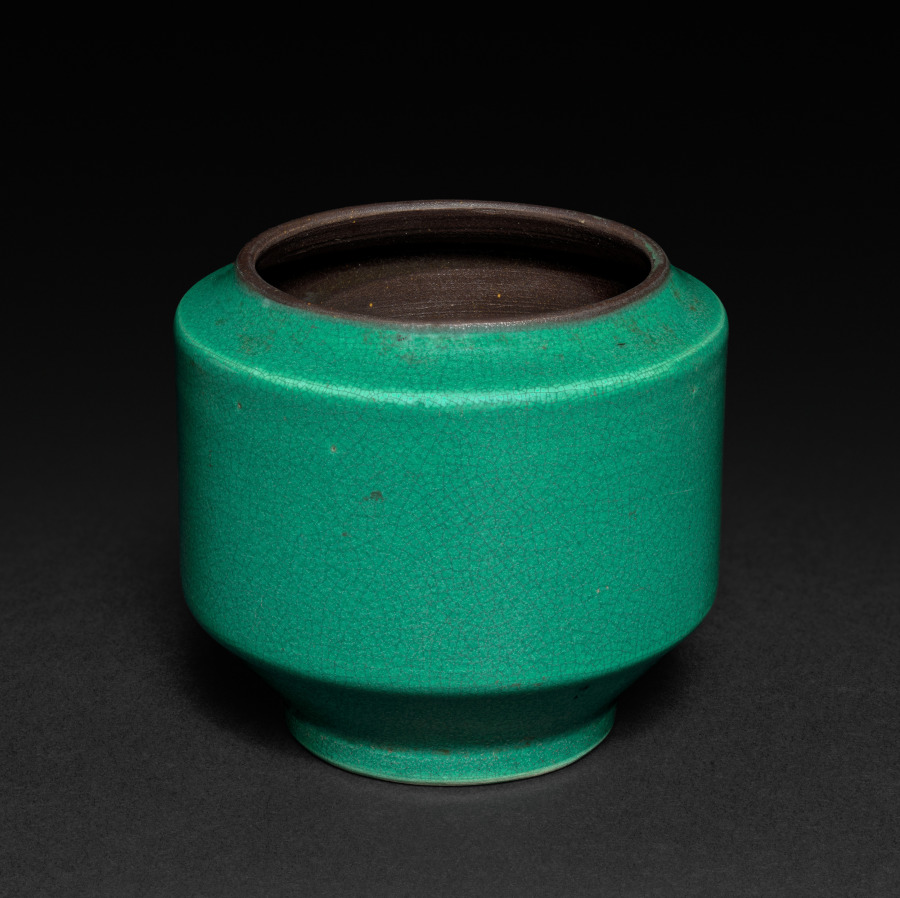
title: Camellia-Leaf-Green Cylindrical Vase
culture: China, Qing dynasty (1644-1911), Kangxi reign (1661-1722)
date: 1661–1722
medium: porcelain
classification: Ceramic